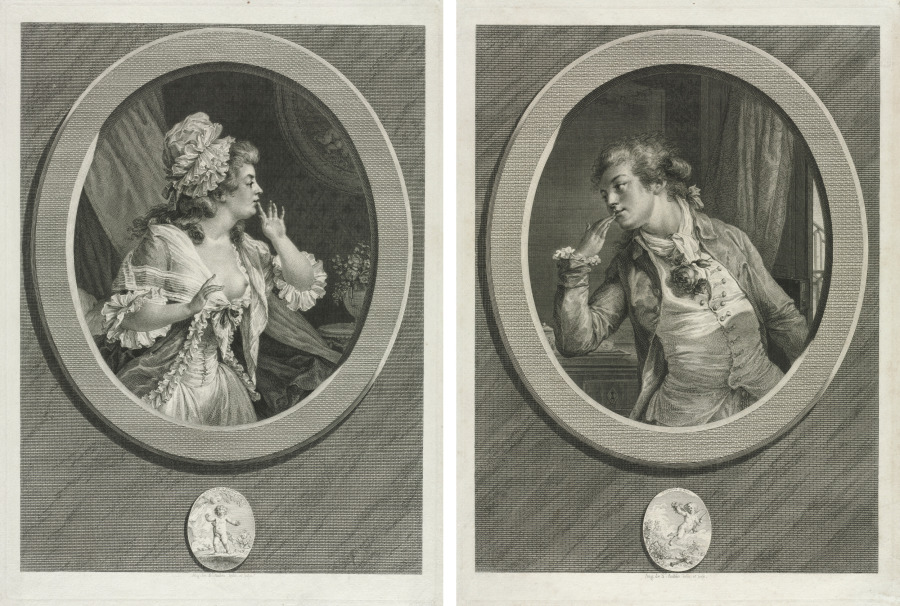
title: At Least Be Discreet and You May Count on Me (pair)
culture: France, 18th century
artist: Augustin de Saint-Aubin (French, 1736–1807)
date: 1789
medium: etching and engraving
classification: Print